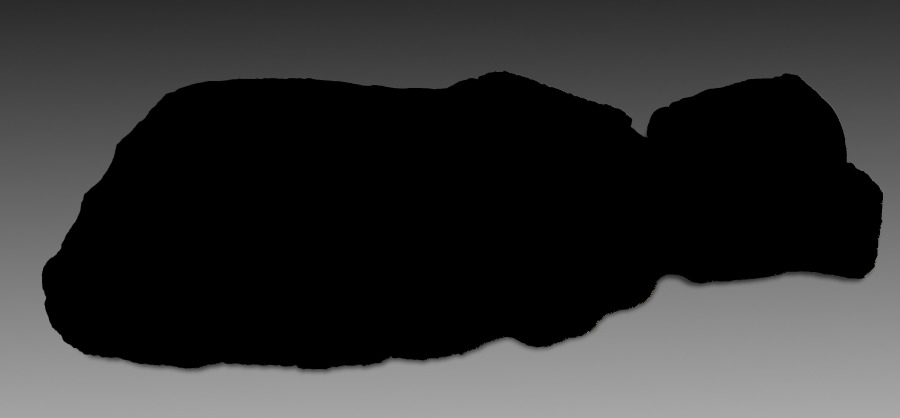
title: Effigy of an Abbot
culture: England, Dorset, 13th century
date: c. 1225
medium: Purbeck marble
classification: Sculpture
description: This funerary effigy represents one of the abbots of Cerne Abbey in Dorset, in southern England. His identity is unknown. Portrayed with tonsured (shaved) head and tightly curled beard, the abbot clasps a book in his left hand and traces of his crozier (staff) may be seen in his right hand—symbols of his office and pastoral authority. The figure is carved from "Purbeck marble," a limestone unique to the Purbeck Hills of Dorset. Very little remains of Cerne Abbey today, but it is known to have existed as early as the 9th century. The abbey was dissolved in 1539 by King Henry VIII during the English Reformation, at which time its buildings were razed to the ground. This is the only work of art that survives from the abbey and, though buffeted by time and history, retains much of its fine sculptural character. The sculpture has the additional distinction of being the only monument of its type in an American museum.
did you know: Researchers have been trying to identify which abbot is depicted here but so far have had no luck.